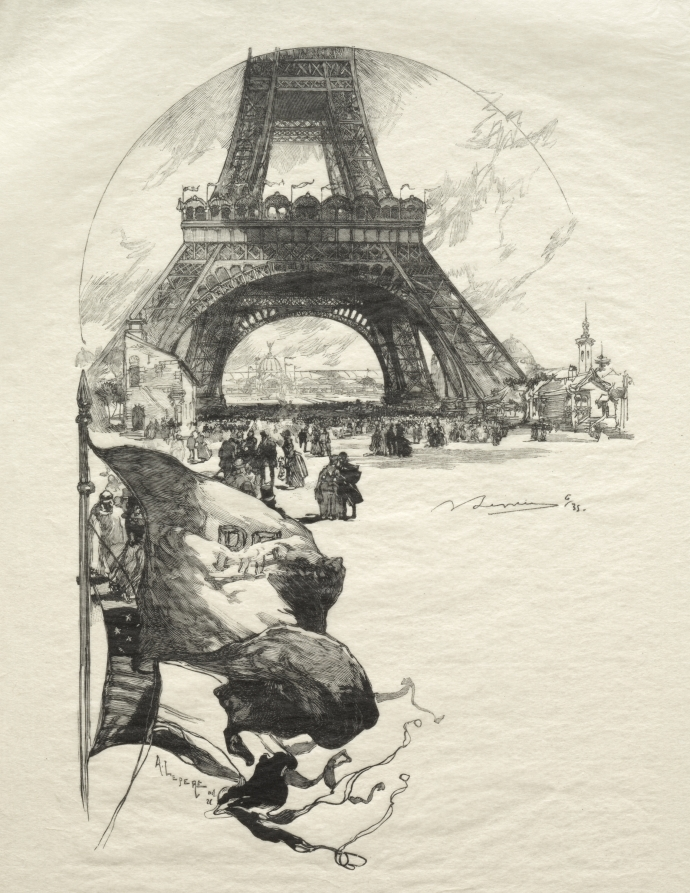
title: La Tour Eiffel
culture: France, 19th-20th century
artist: Auguste Louis Lepère (French, 1849–1918)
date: 1889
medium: wood engraving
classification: Print